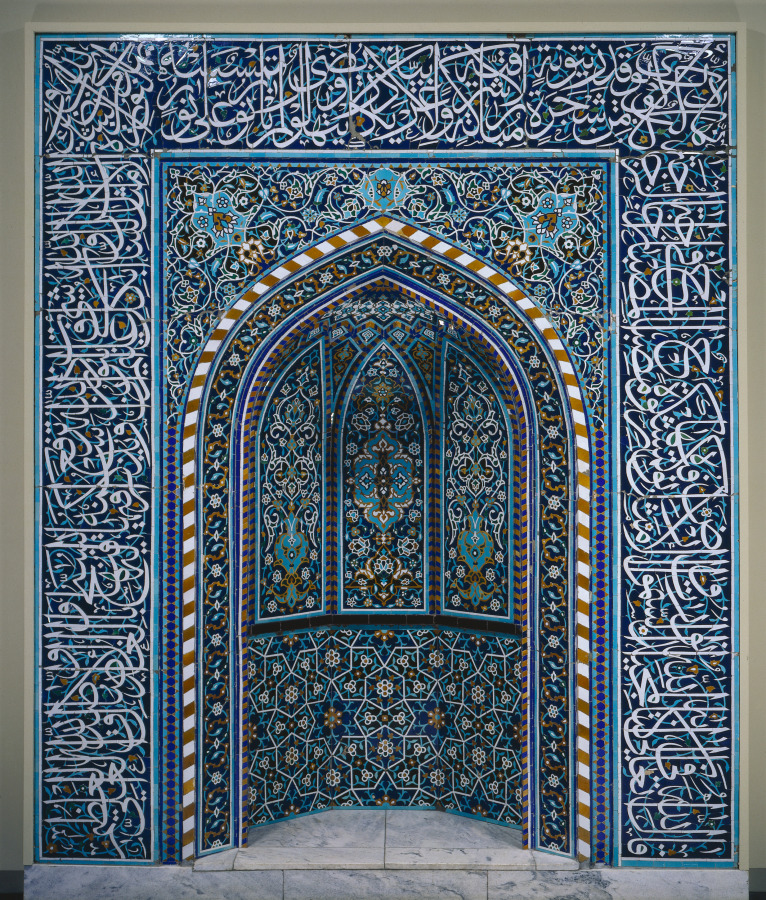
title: Prayer Niche (Mihrab)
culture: Iran, Isfahan, in the style of the Safavid period (1501–1722)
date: c. 1500s or mid-1900s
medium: ceramic mosaic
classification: Ceramic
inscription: The inscriptions on the mihrab and frieze are from the Qur'an. On the frieze are written the first 30 verses from the Chapter of the Dawn (89). The inscription on the mihrab is from the Chapter of Light (24: 35-36) and translates: God is the light of the Heavens and the Earth. His Light is like a niche in which is a lamp---the lamp enclosed in glass---the glass, as it were, a glistening star. From a blessed tree it is lighted, the olive neither of the East nor of the West, whose oil would well neigh shine out, even though fire touched it not! It is light upon light. God guideth whom He will to His light, and God setteth forth parables to men, for God knoweth.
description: The prayer niche (or mihrab in Arabic) is the focal point in the interior of a mosque, located in the qibla wall that faces Mecca, the holy city of Islam. Verses from the holy Qur’an, written in a form of Arabic script called thuluth, surround the mihrab. The inscription is rendered with white glaze, while the continuous arabesque vine behind the Qur’anic text is executed in gold, turquoise, and green—the color of the Prophet Muhammad and of paradise. The inscription is from the Chapter of Light (Surah An-Nur): “Allah is the light of the Heavens and the Earth. His Light is like a niche in which is a lamp—the lamp enclosed in glass—the glass, as it were, a glistening star; lit from a blessed olive tree, neither of the East nor of the West, whose oil would almost glow, even though fire touched it not. Light upon light! Allah guides whom He will to His light, and Allah sets forth parables for men, and Allah knows all things.” The artistic and calligraphic styles suggest this mihrab was made about 1500, but the physical appearance of the ceramic mosaic pieces does not. The glaze colors are too consistent, and they have not discolored from moisture seeping behind the cut tile edges. Clay substrates of the tiles were tested in 2001 using thermoluminescence to determine the date the tiles were fired. The results indicated that the tiles were modern, made between 1941 and 1961, and they are under further examination.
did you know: Every mihrab is oriented toward Mecca.